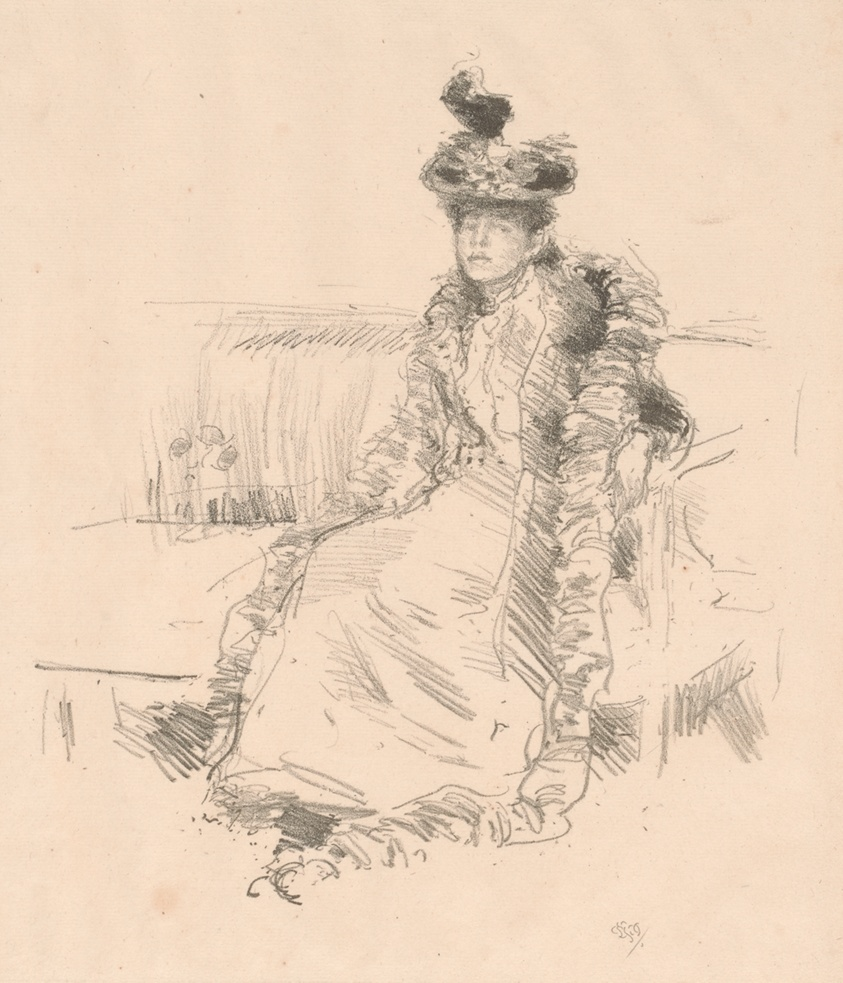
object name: Print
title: A Lady Seated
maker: James McNeill Whistler (American, 1834-1903)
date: 1893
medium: Lithograph, in black ink, with scraping and touches of brush and tusche, on cream laid paper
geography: United States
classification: lithograph; print; prints and drawing; paper